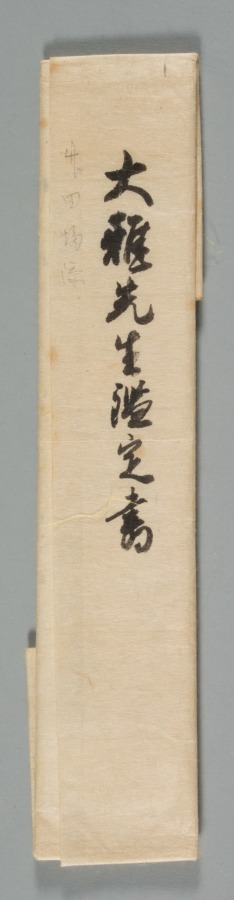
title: Mountain View and Blue Water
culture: Japan, Edo period (1615–1868)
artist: Tanomura Chikuden (Japanese, 1777–1835)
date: early 1800s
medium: hanging scroll; ink, color, and gold on paper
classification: Painting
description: Tanomura Chikuden was an eminent painter whose adopted son, Tanomura Chokunyū (1814–1907), was Seifū Yohei III’s painting teacher. This work was displayed at a gathering commemorating the 10th anniversary of Chokunyū’s death, something we know only because its custom-made box and archival documents have been carefully kept together. The box inscription also confirms that Chikuden was emulating the style of the Mi family of painters, active during China’s Southern Song dynasty (1127–1279). The painting’s Chinese-style silk wrapper is inscribed and sealed on its interior by members of Chokunyū’s community.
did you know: The mountain shapes are built up with multiple small wet strokes.